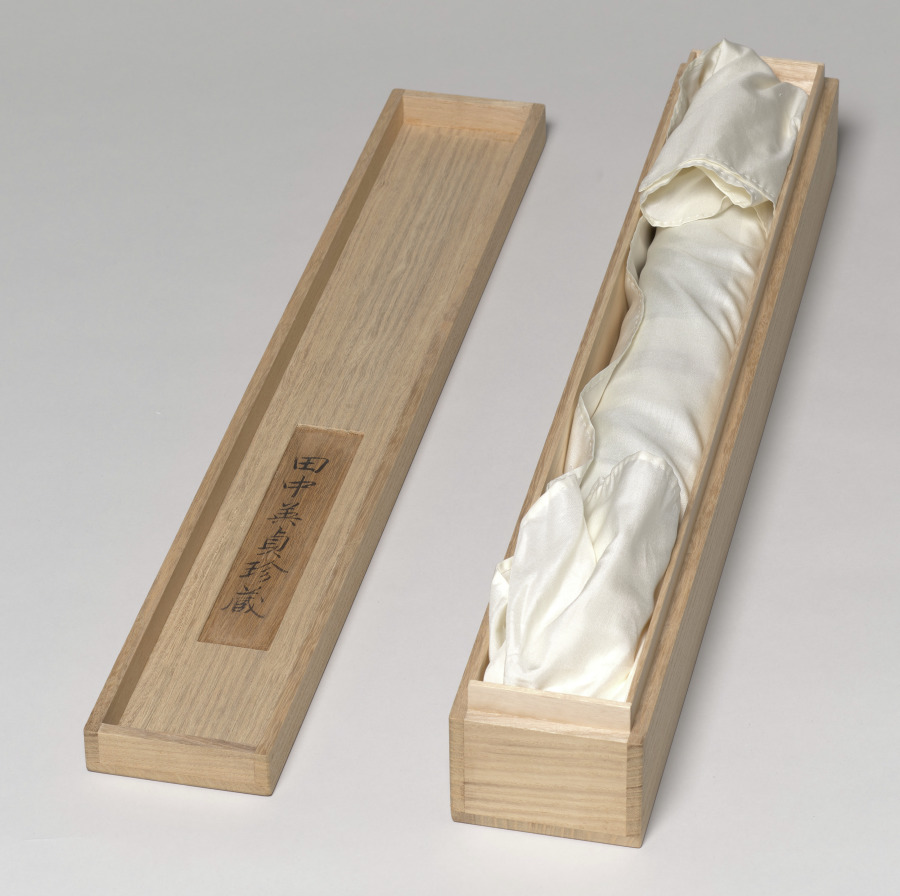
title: Orchid Pavilion Gathering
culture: Japan, Edo period (1615–1868)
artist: Soga Shōhaku (Japanese, 1730–1781)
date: 1777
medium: hanging scroll; ink on silk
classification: Painting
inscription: Inscribed upper right: Sixth year of An'ei (1777) mid-winter, Soga Shohaku Seal: Dasokken Shohaku Seal: Unread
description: This painting depicts a famous gathering that took place in China in AD 353 to celebrate the Spring Purification Festival, also known as the Double Third Festival, as it takes place on the third day of the third lunar month. The host invited everyone to the Orchid Pavilion to compose poetry and drink wine. Guests floated wine cups down a nearby creek, and where they landed, people had to drink the wine and compose a poem.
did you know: The Buddhist temple Bairinji in Kurume City, Fukuoka prefecture, Japan, and the National Gallery of Victoria in Melbourne, Australia, own compositions by the same artist on the same theme.